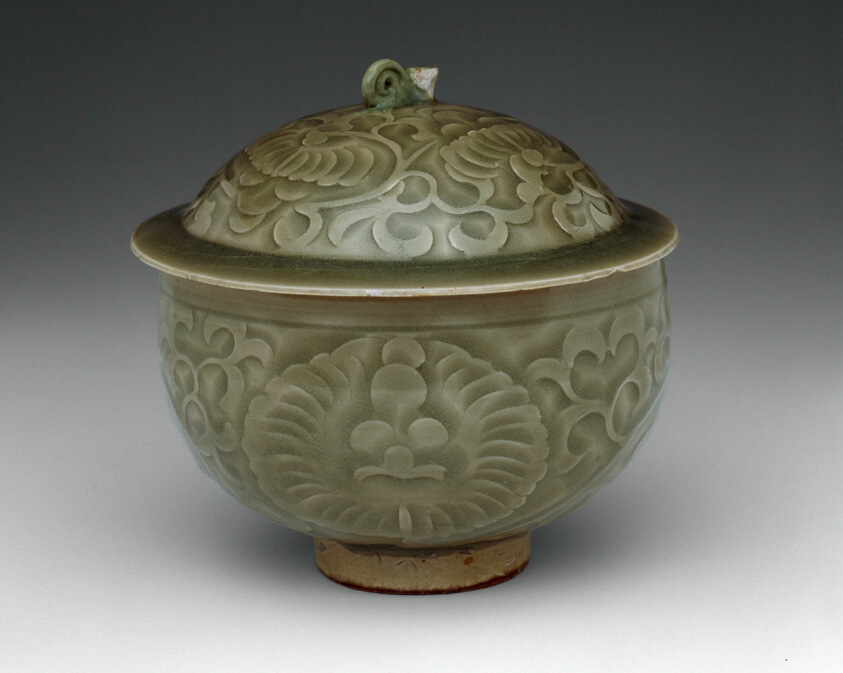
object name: Vessel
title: Covered Bowl with Peony Scroll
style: Chinese (culture or style)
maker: China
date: Northern Song dynasty (960–1127), 11th century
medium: Yaozhou ware; stoneware with underglaze carved decoration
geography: China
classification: bowl; stoneware; dish (vessel); ceramics; asian art; vessel